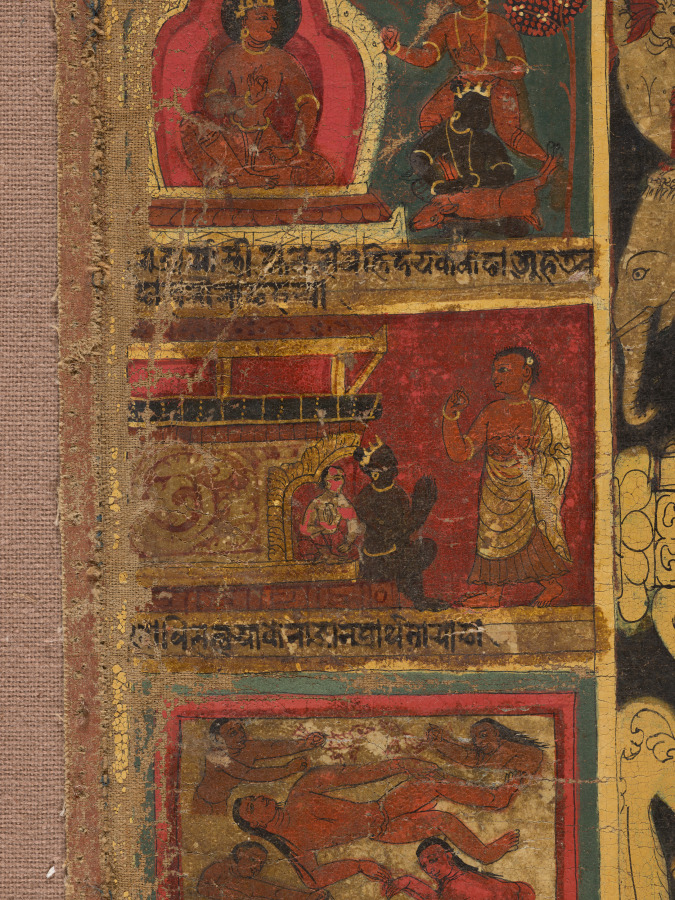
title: Bejeweled Buddha Preaching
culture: Nepal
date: 1648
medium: Gum tempera, ink, and gold on cloth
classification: Painting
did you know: Nepalese devotional paintings on cloth are called "paubha" in the Newari language.